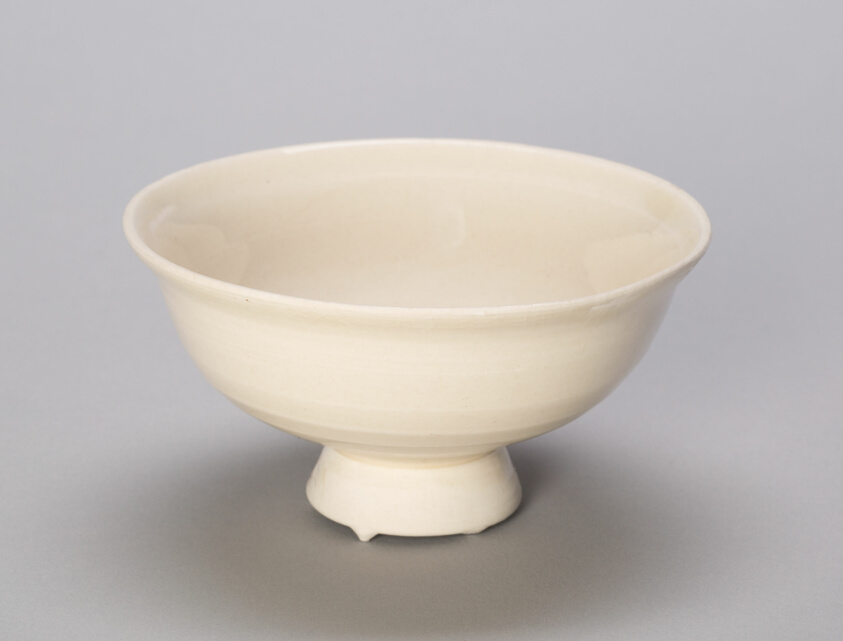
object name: Decorative Arts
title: Stem Bowl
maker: China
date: Jin (1115–1234) or Yuan dynasty (1279–1368), 13th/14th century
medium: Huozhou ware; glazed stoneware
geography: China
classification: bowl; dish (vessel); ceramics; decorative arts